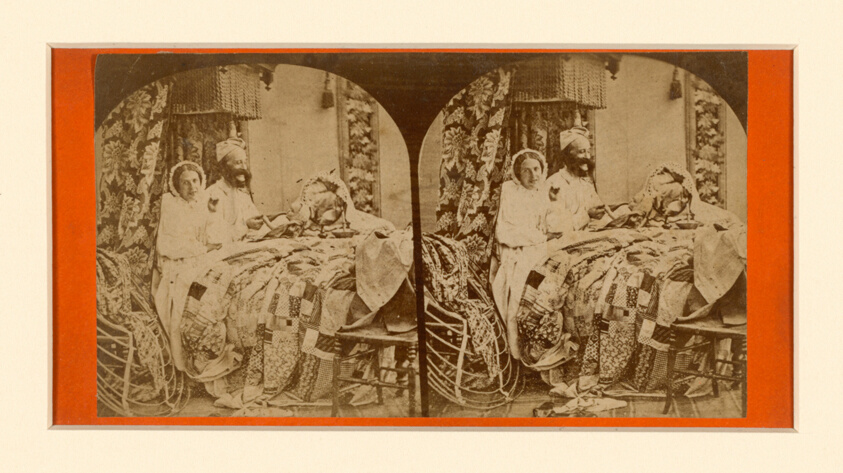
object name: Photograph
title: Morning Chimes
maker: United States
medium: photograph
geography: United States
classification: textile; accessories (object genre); photograph; photography